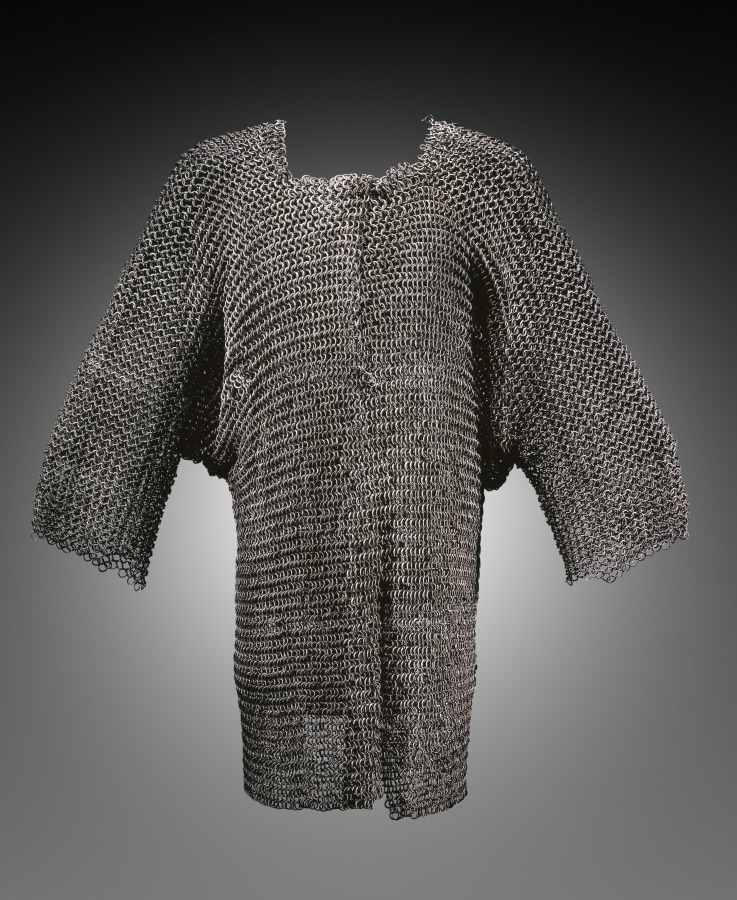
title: Hauberk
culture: European, 15th century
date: 1400s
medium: riveted steel rings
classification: Arms and Armor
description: A hauberk is a mail shirt commonly extending to mid-thigh. Mail, a type of armor made from interlocking iron or steel rings, was effective at protecting the wearer from the sharp cuts of a sword, and yet was less useful against crushing impacts from blunt weapons. A hauberk would have been worn over an aketon, a padded protective garment.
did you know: Although this hauberk weighs about 21 pounds, the even distribution of the weight makes it easy to wear.